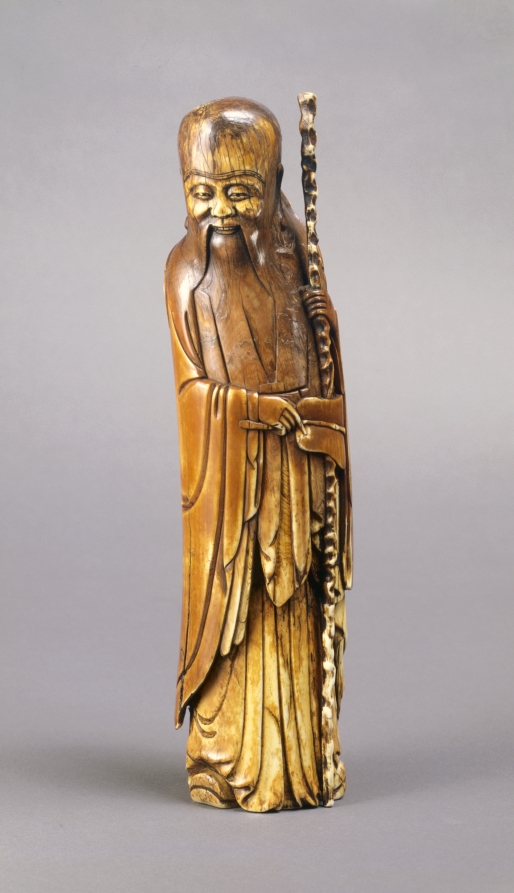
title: Shoulao (The God of Longevity)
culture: China, Ming dynasty (1368–1644)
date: c. 1580–1644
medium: ivory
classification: Ivory